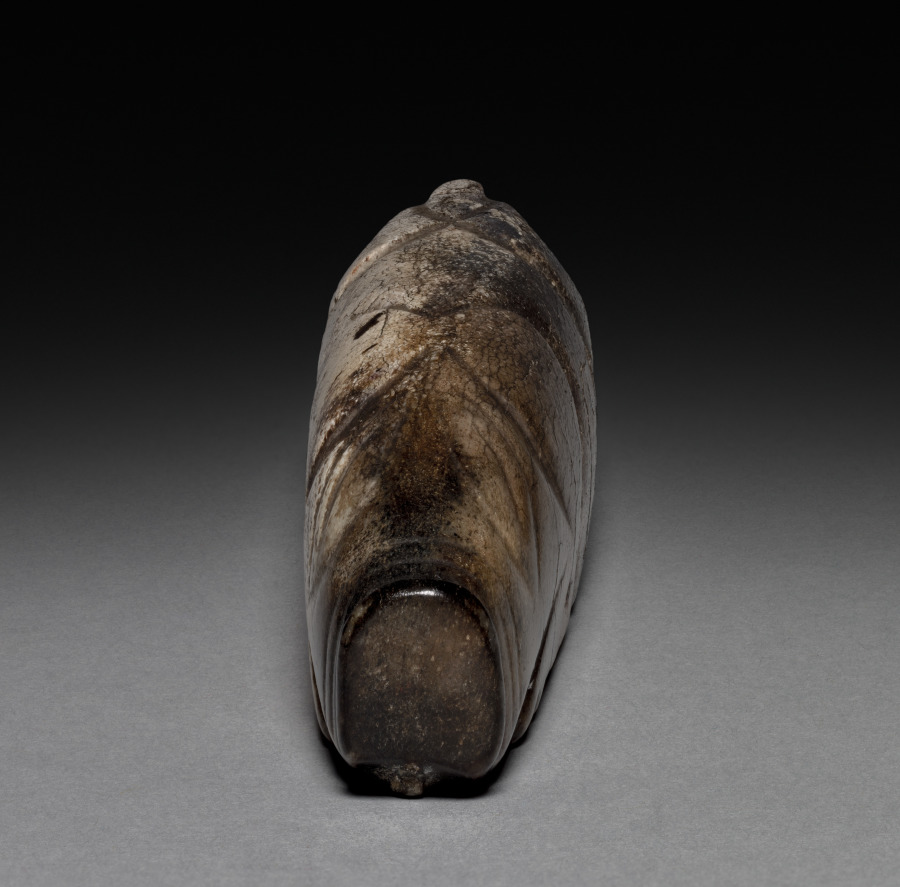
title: Pig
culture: China, Zhou dynasty (c. 1046–256 BCE)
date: 1045–256 BCE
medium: jade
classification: Jade